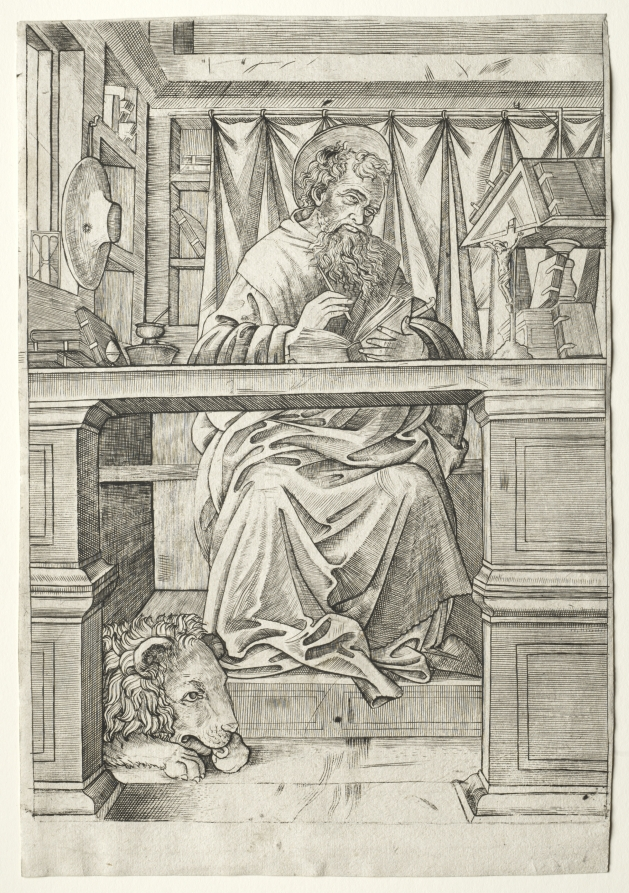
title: St. Jerome in His Study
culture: Italy, early 16h Century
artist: Giovanni Antonio da Brescia (Italian)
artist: after Filippino Lippi (Italian, c. 1457–1504)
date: c. 1510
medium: engraving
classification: Print